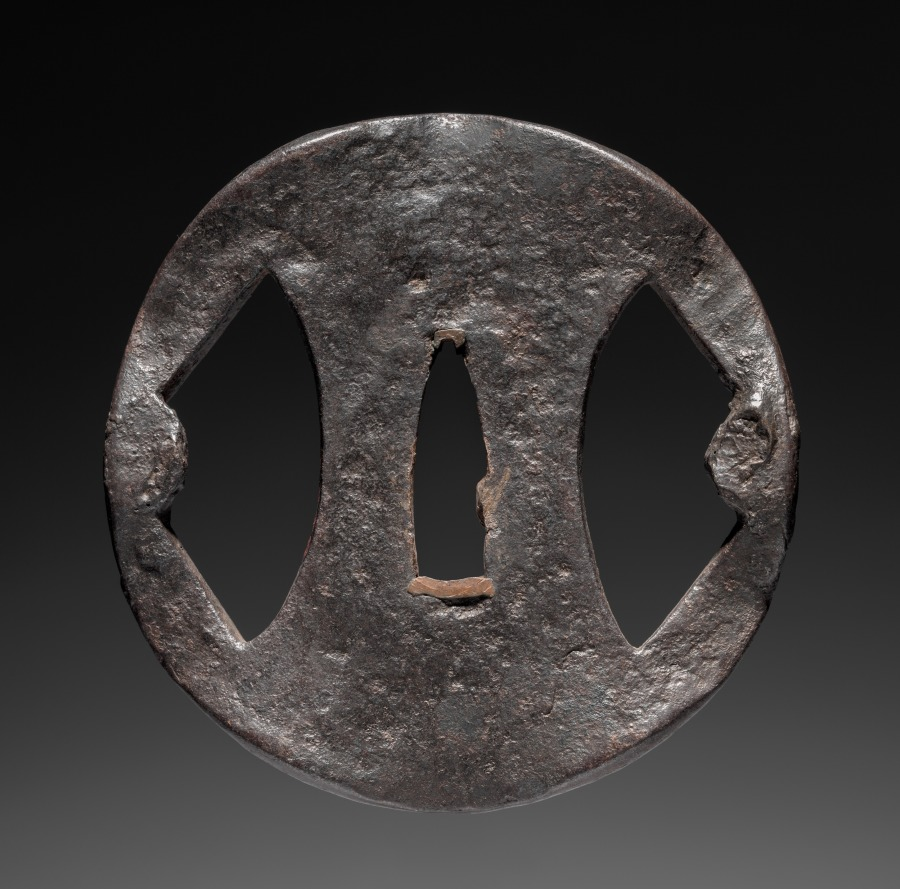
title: Sword Guard (Tsuba) with Fans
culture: Japan, possibly Edo period (1615-1868)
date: c. 1615–1868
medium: iron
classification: Arms and Armor